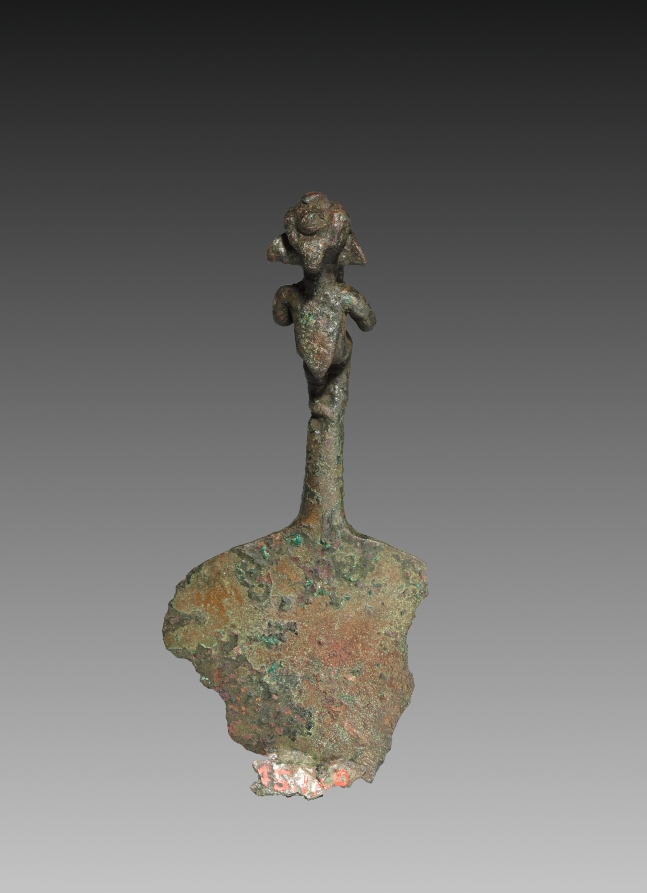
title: Knife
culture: Peru, Inca Culture, 15th-16th century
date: 1400s-1500s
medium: bronze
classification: Metalwork